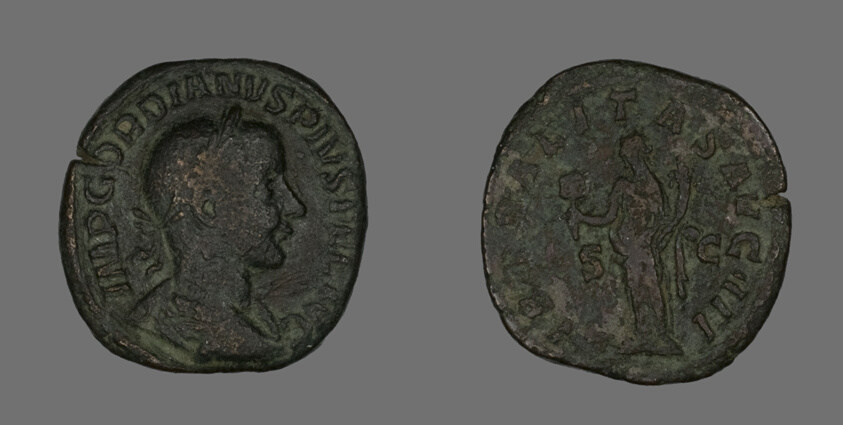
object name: Coin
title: Sestertius (Coin) Portraying Emperor Gordianus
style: roman (ancient, style or period), ancient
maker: Roman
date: 238-244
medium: Bronze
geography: Roman Empire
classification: coin; ancient art